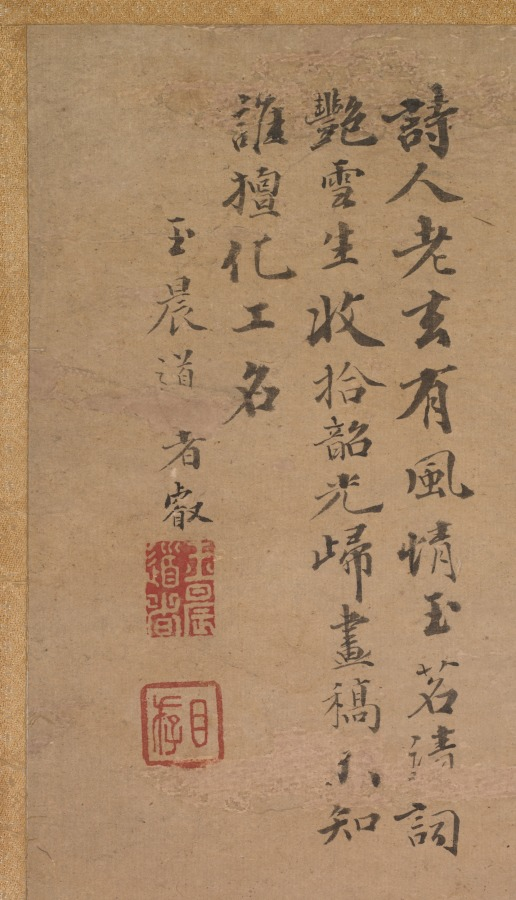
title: The Crossing of the Yangzi River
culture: China, Qing dynasty (1644-1911)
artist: Shang Rui (Chinese, 1634?-)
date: c. 1700–1720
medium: hanging scroll, ink and slight color on paper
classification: Painting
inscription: Colophons: One upper left inscription by the artist followed by two seals; one upper right inscription followed by two seals; three other seals, one in lower left